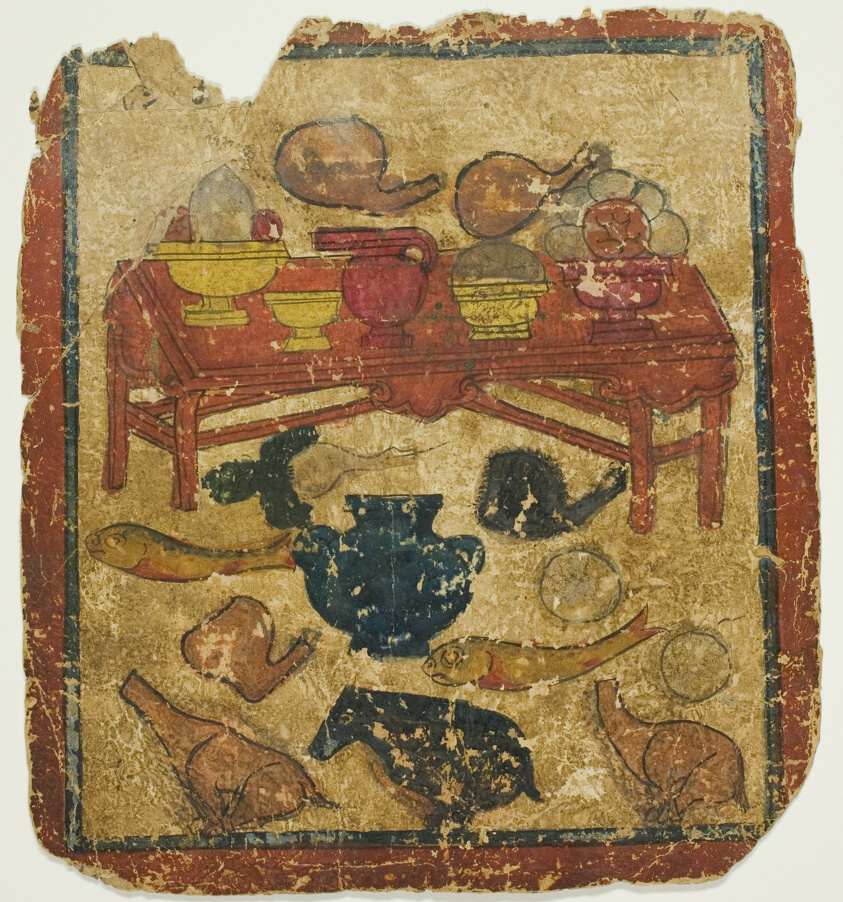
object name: Religious/Ritual Object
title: Offerings of Food, from a Set of Initiation Cards (Tsakali)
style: Himalayan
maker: Southern Tibet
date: 14th/15th century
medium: Ink and watercolor on paper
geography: Tibet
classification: ink; ritual objects